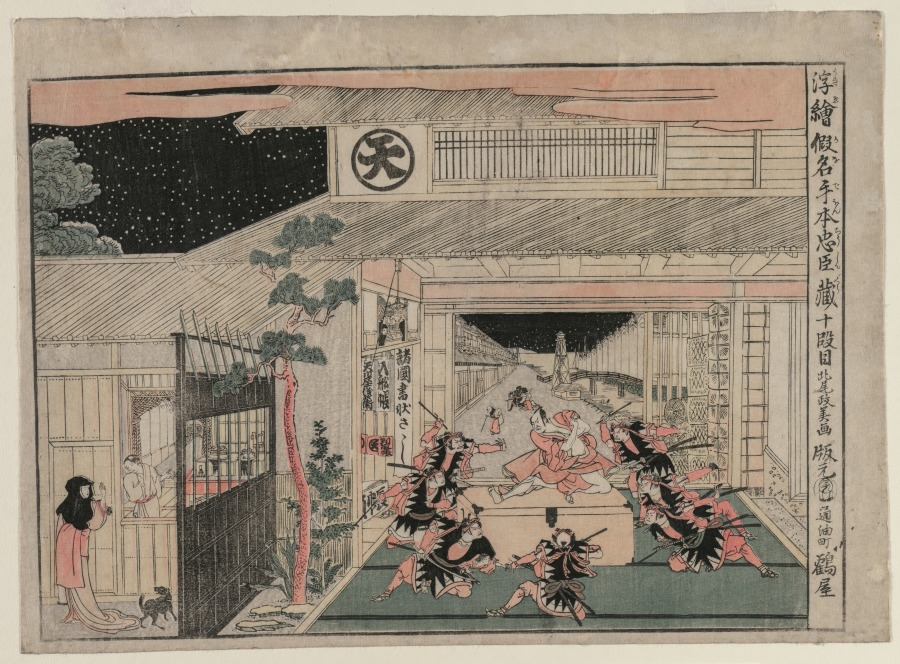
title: Chushingura: Act X (from the series Perspective Pictures for The Treasure House of Loyalty)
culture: Japan, Edo period (1615–1868)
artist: Kitao Masayoshi (Japanese, 1761–1824)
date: c. 1790s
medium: color woodblock print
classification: Print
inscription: Signature: Kitao Masayoshi ga Publisher: Tsuruya Kiemon (hammoto Toriaburacho Tsuruya, emblem) Censorship Seal: kiwame